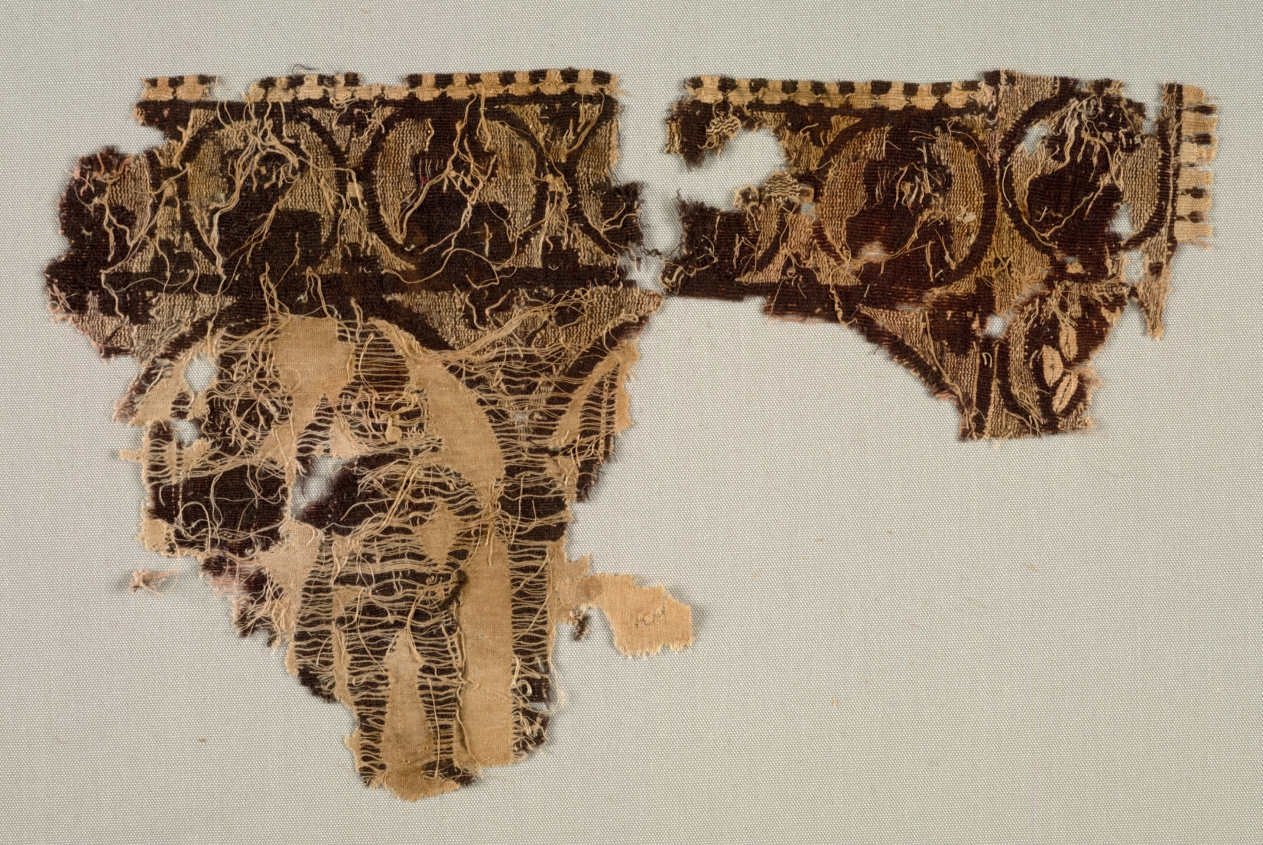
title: Neck Ornament of a Tunic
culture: Egypt, Byzantine period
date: 400s CE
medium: Undyed linen and dyed wool: tapestry weave with supplementary weft wrapping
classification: Textile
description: This was the front or back ornament of a unisex tunic neck opening made in linen. The border at the neck displays an interlacing vine scroll inscribing alternating male and female busts. Below it are two of the original three arches and one of the supporting columns with a stylized capital. The male figure on the left wears a short garment (chiton) draped over one shoulder and has a shield. He is accompanied by a figure on the right.